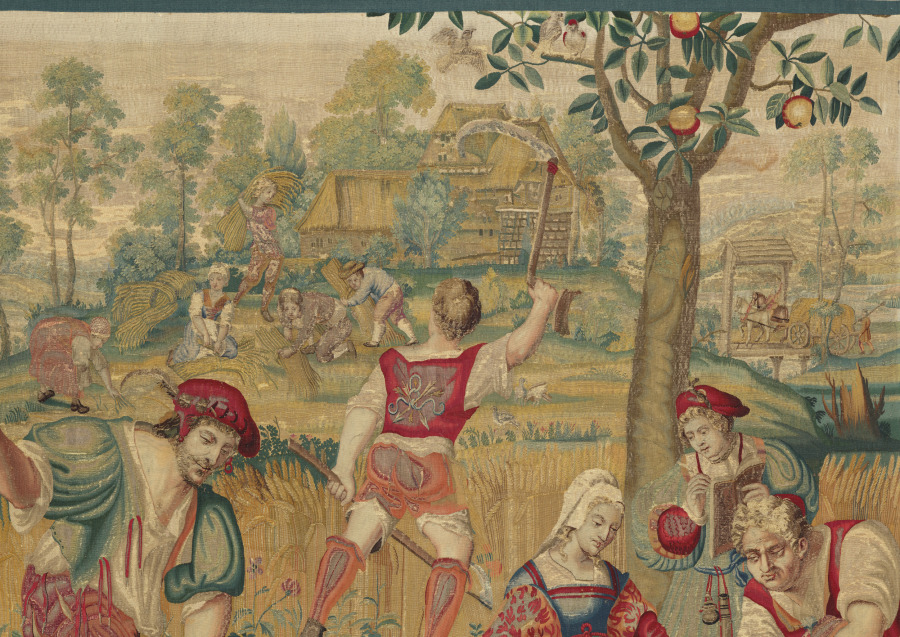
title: Summer: Harvest Scene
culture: France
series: Four Seasons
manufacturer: possibly by Gobelins Manufactory (France, Paris, est. 1662)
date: designed c. 1535, woven mid- to late 1600s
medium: Wool, silk, and gold filé: tapestry weave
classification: Tapestry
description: The wheat harvest took place in July and represented the hard, hot work of summer. The reaper in the foreground and his companion in the middle distance swing their scythes high above their heads as they prepare to cut the wheat stalks. Underneath the shade of an apple tree, three figures in the foreground are determining a price for the wheat. A woman gestures to the coins that the seated man is counting. Behind them another man holds an account book, in which he records their decisions. His pen holder and ink pot hang from his belt. In the distance to the right, two horses draw a cart piled high with wheat toward four farmers who gather bunches of wheat stalks together and tie them into bundles.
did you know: Images of the harvest provided a way to express pride in the fruitfulness and plenty of a particular region and celebrate the diligence of the field laborers.